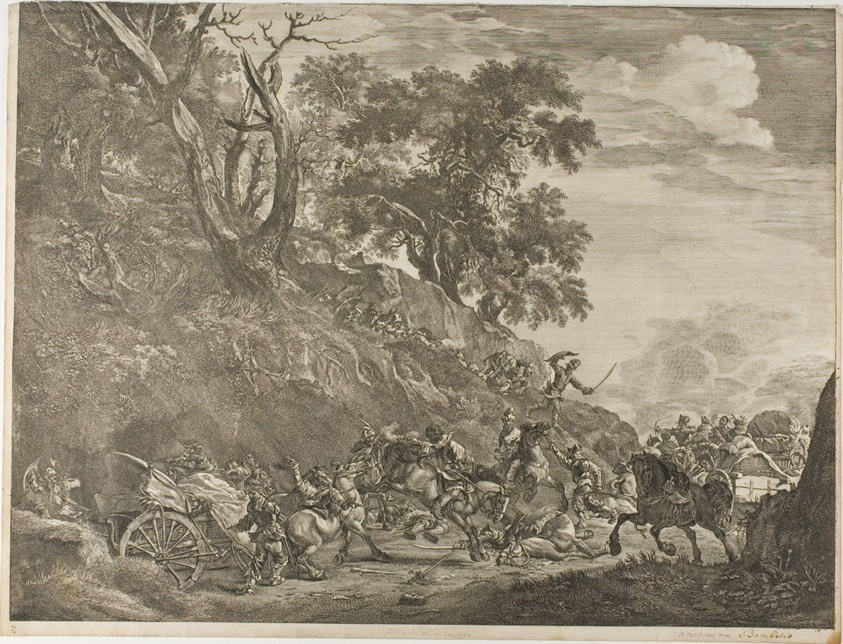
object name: Print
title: The Robbery of the Wagons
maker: Cornelis Visscher (Dutch, c. 1629-1658); after Pieter van Laer (Netherlandish, 1592/95-1642)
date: c. 1649-58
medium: Etching on paper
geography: Holland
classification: engraving; print; prints and drawing